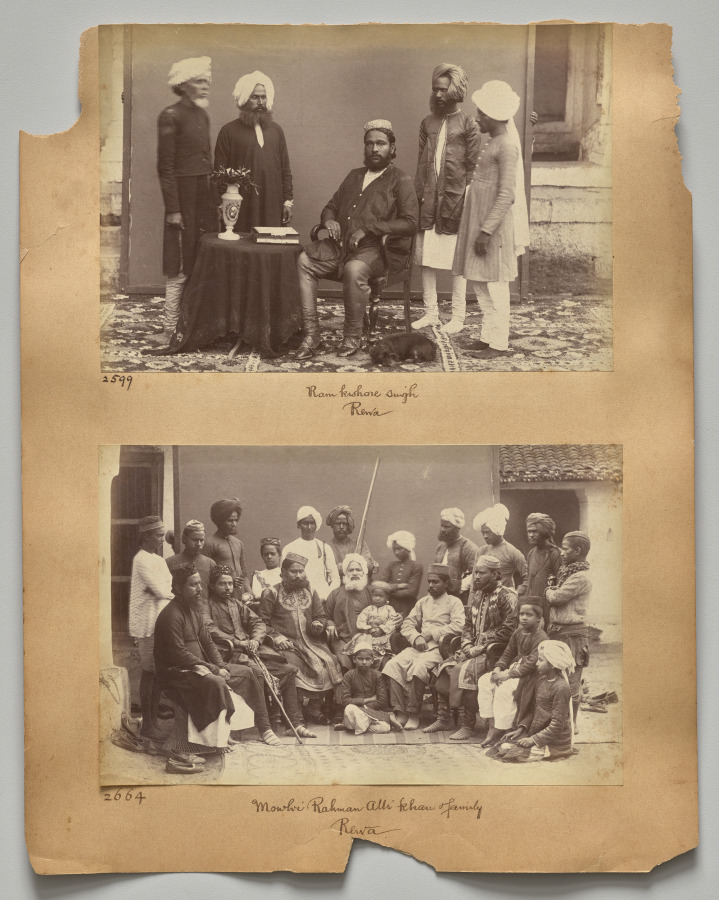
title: Ramkishore Singh, Rewa (recto, top)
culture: India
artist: Raja Deen Dayal (Indian, 1844–1905)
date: c. 1882–87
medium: albumen print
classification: Photograph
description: These photographs are part of an album, now disassembled, of around 105 photographs taken in India between 1885 and summer 1887 that provide glimpses into the lives of the British colonial elite and royal and upper-class Indians. The museum holds another group of 37 pictures from this album (2016.266), which was probably commissioned by a British civil servant visiting or working in India around 1888 as a personal souvenir of his experiences there.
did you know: Raja Deen Dayal is regarded now, and was considered during his lifetime, to be India’s most important 19th-century photographer.